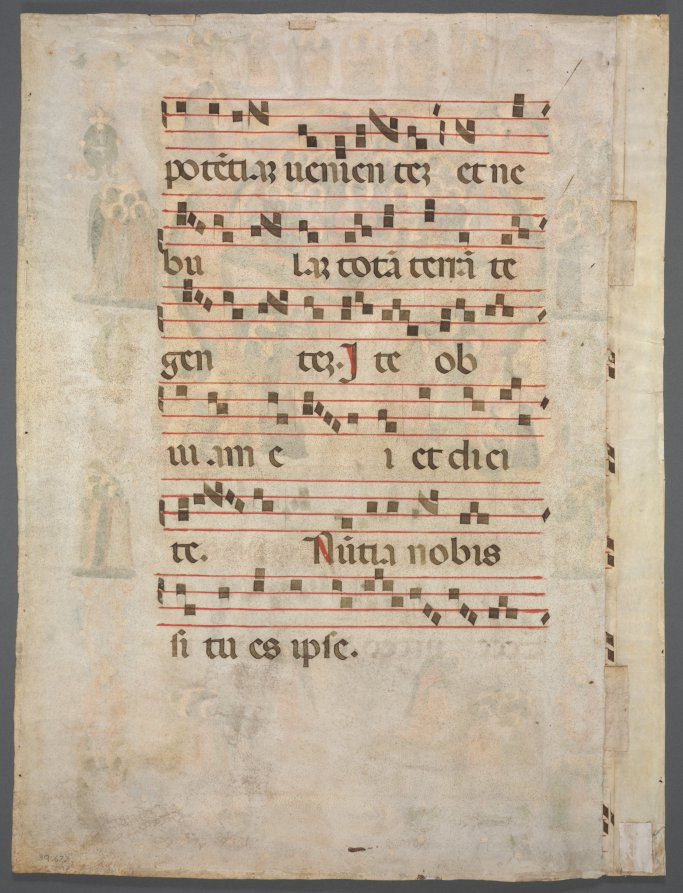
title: Single Leaf Excised from an Antiphonary: Inital A[spiciens a longe] with Christ in Majesty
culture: Italy, Tuscany or Umbria, 14th century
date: c. 1330–1350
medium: ink, tempera, and gold on vellum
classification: Manuscript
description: This massive historiated initial A, among the largest painted by Renaissance illuminators, introduces the matins response for the first Sunday in Advent. For centuries this particular Sunday was known as Aspiciens a longe Sunday, since this is the very first chant of the Christian liturgical year to be sung with a special choir, or Schola Cantorum, on that day. The text as well as the image follow the prophecy of Isaiah who foresaw the birth of Christ: Aspiciens a longe, ecce, video potentiam (Long had I been watching. Behold, now do I see God coming in power as in a cloud of light). Within the letter A, Christ is enthroned in majesty surrounded by angels and saints meant to represent the redeemer who is yet to come. The two figures who occupy the bottom curves of the A are Old Testament prophets; on the left is Isaiah who holds a scroll revealing his prophecy: “Behold, a Virgin can conceive.”